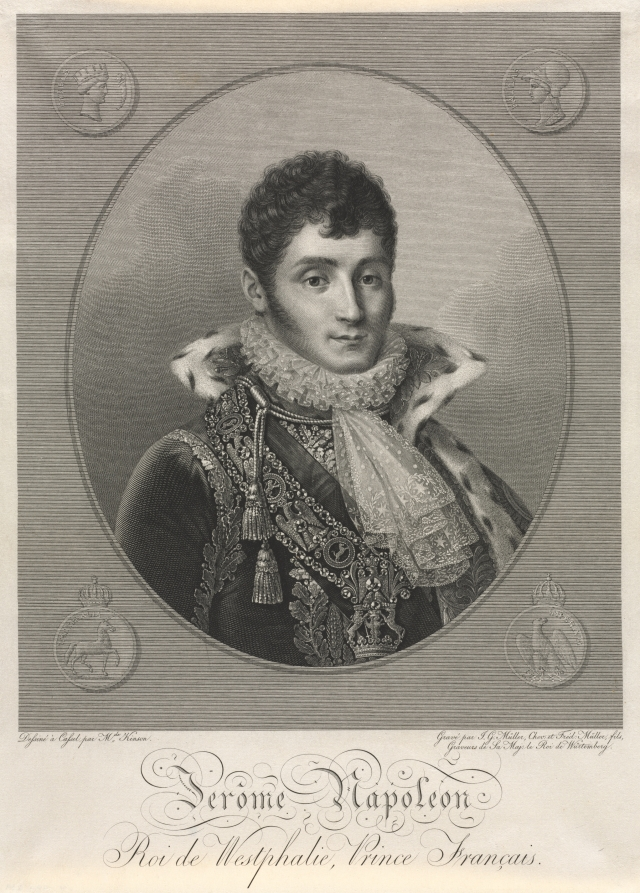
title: Jerome Napoleon, King of Westphalia, French Prince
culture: Germany, 19th century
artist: Christian-Friedrich Muller (German, 1782–1816)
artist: and Johann Gotthard von Muller (German, 1747–1830)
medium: engraving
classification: Print